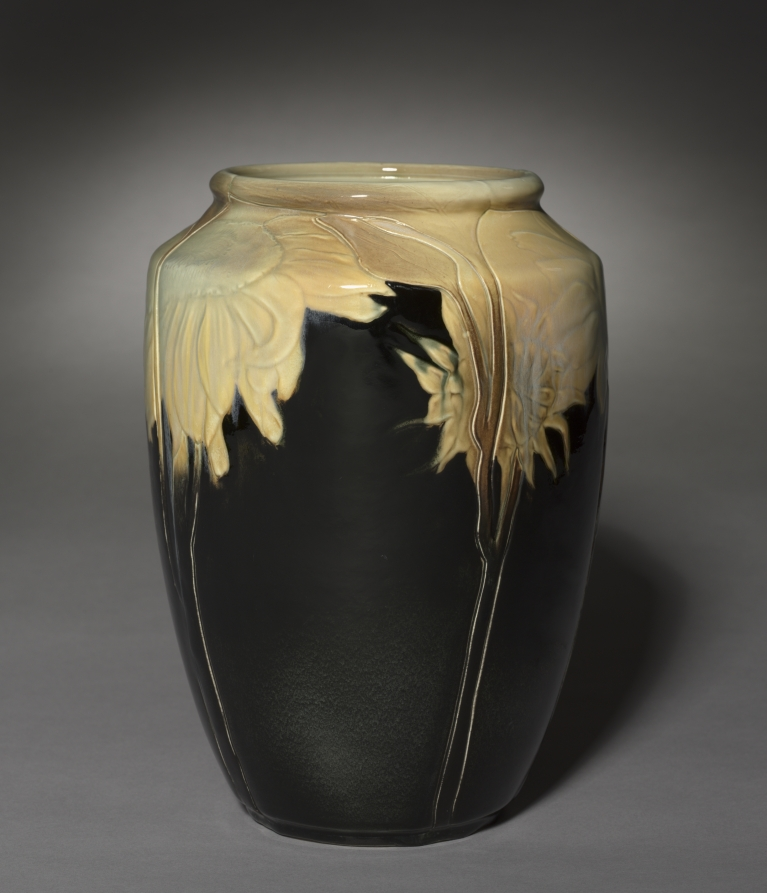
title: Vase Decorated with Sunflowers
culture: America, late 19th Century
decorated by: John D. Wareham (American, 1871–1954)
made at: Rookwood Pottery Company (American, established 1880)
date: 1899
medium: earthenware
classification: Ceramic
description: Floral and animal motifs are common decoration found on vessels designed by John D. Wareham for the Cincinnati-based Rookwood Pottery Company. Here, bright yellow sunflowers around the mouth of the vase are enhanced by stark black.